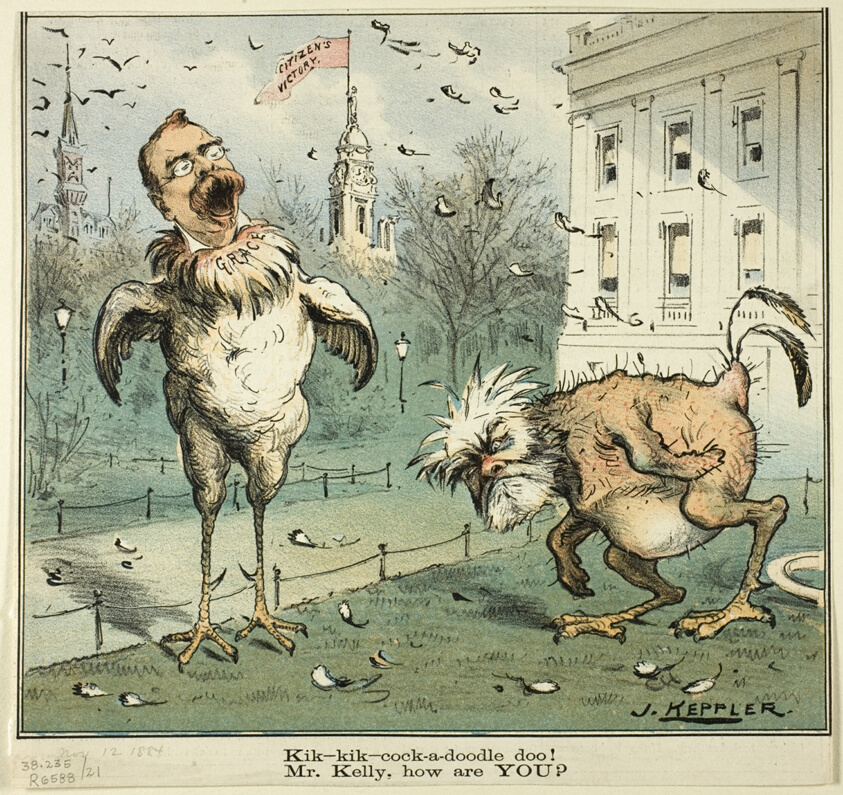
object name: Print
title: Kik-kik-cock-a-doodle doo! Mr. Kelly, how are YOU?, from Puck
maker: Joseph Keppler (American, 1638-1894)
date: published November 12, 1884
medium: Color lithograph on newsprint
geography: United States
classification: lithograph; print; prints and drawing